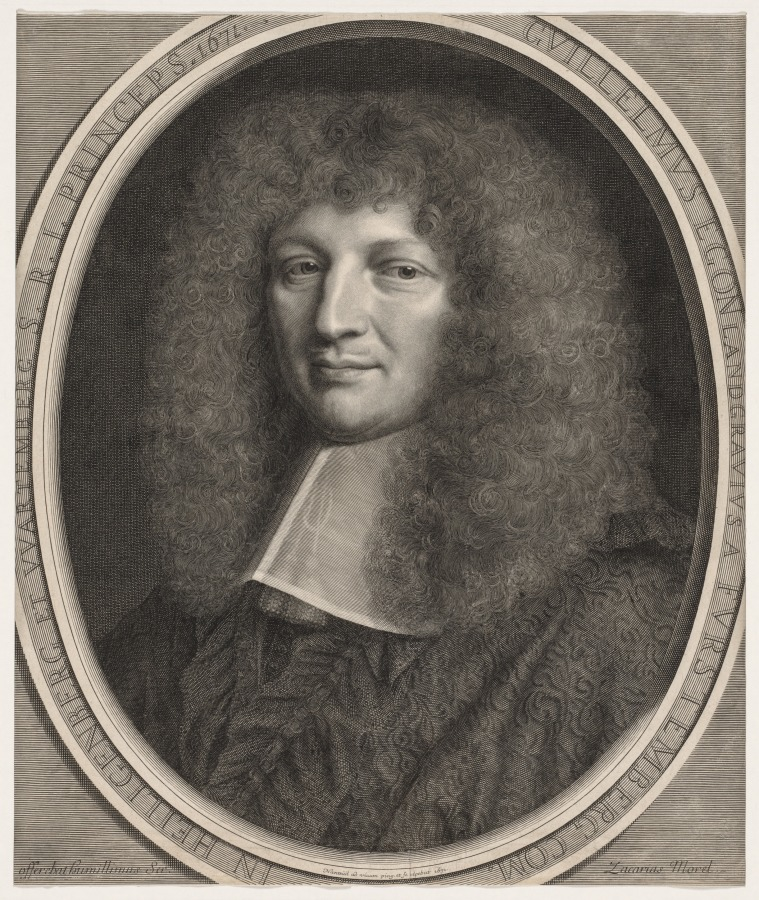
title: Cardinal of Furstenberg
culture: France, 17th century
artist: Robert Nanteuil (French, 1623–1678)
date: 1671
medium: engraving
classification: Print